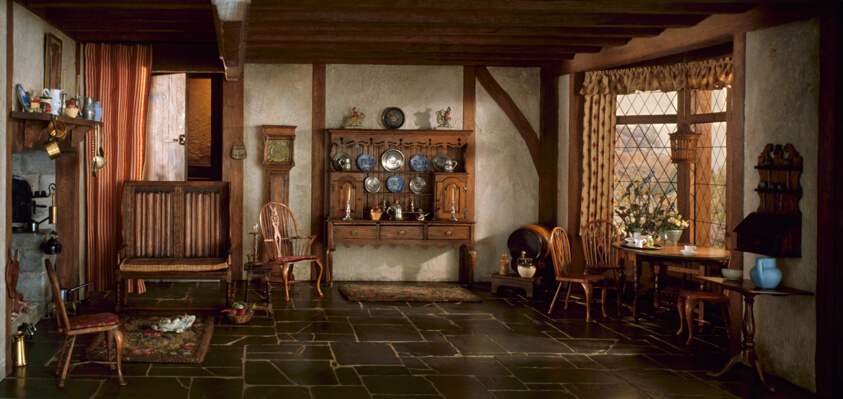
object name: Miniature room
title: E-5: English Cottage Kitchen of the Queen Anne Period, 1702-14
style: queen anne, stuart, european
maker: Designed by Narcissa Niblack Thorne; American, 1882-1966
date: c. 1937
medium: Miniature room, mixed media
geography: United States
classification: miniature; thorne rooms